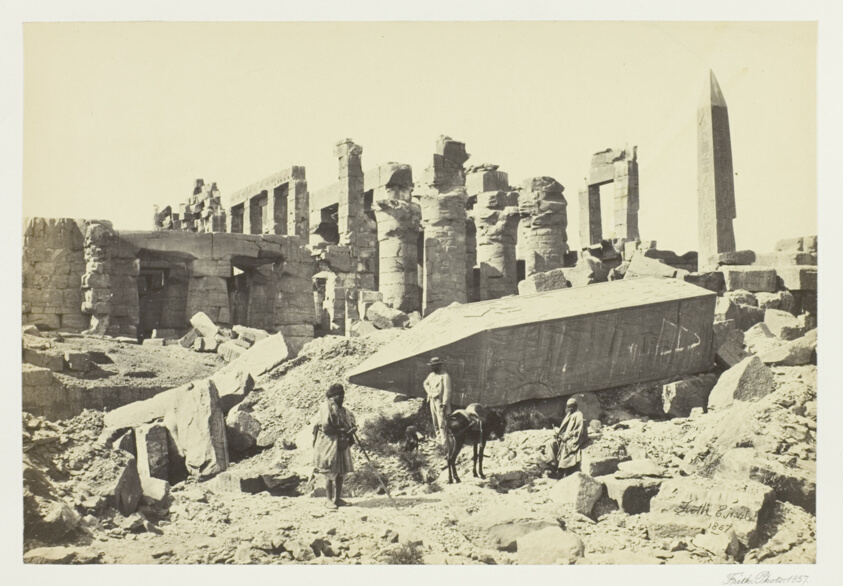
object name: Photograph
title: The Broken Obelisk, Karnac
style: 19th century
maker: Francis Frith (English, 1822–1898)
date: 1857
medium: Albumen print, pl. 33 from the album "Egypt and Palestine, Volume II" (1858/60)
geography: England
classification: albumen silver print; photographic process; photography; photograph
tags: Collected by Hugh Edwards, Egypt and Palestine